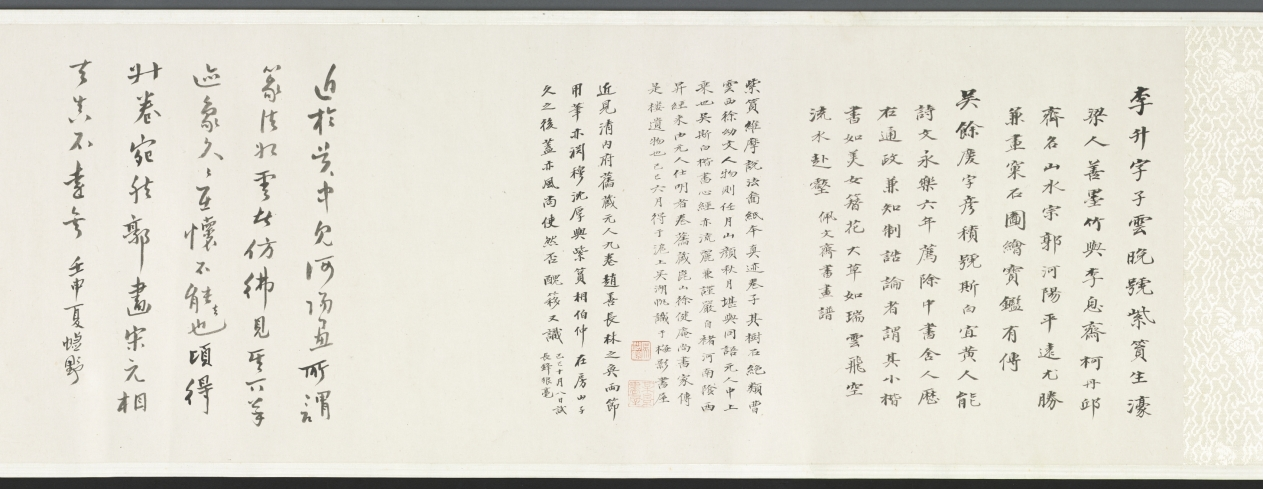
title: Buddha's Conversion of Five Bhiksu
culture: China, Yuan dynasty (1271–1368)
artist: Li Sheng (Chinese, active c. 1324–after 1375)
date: mid-1300s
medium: handscroll; ink on paper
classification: Painting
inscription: 紫篔生李升識 [印] 李氏子雲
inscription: 4 colophons and 12 additional seals: The "Heart" Sutra (Maha Prajnaparamita) text written by Wu Yuqing 吳餘慶 (active early 1400s); 2 seals of Xu Qianxue 徐乾學 (1631–1694); 3 colophons, one dated 1929 and two dated 1936, and 9 seals of Wu Hufan 吳湖帆 (1894–1968); 1 colophon, dated 1932, of Chen Dingshan; 1 seal unidentified.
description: This episode stems from the life of the historical Buddha, who, after his enlightenment, was initially hesitant about preaching his own doctrine. After much personal deliberation and prodding by deities, he finally relented. The first converts were the five guards who served him when he was still a prince. For Li Sheng, this is the pretext of the painting, which moves from the interaction of the bhiksu with the Buddha to a broader awareness of the vast surroundings of the scene.